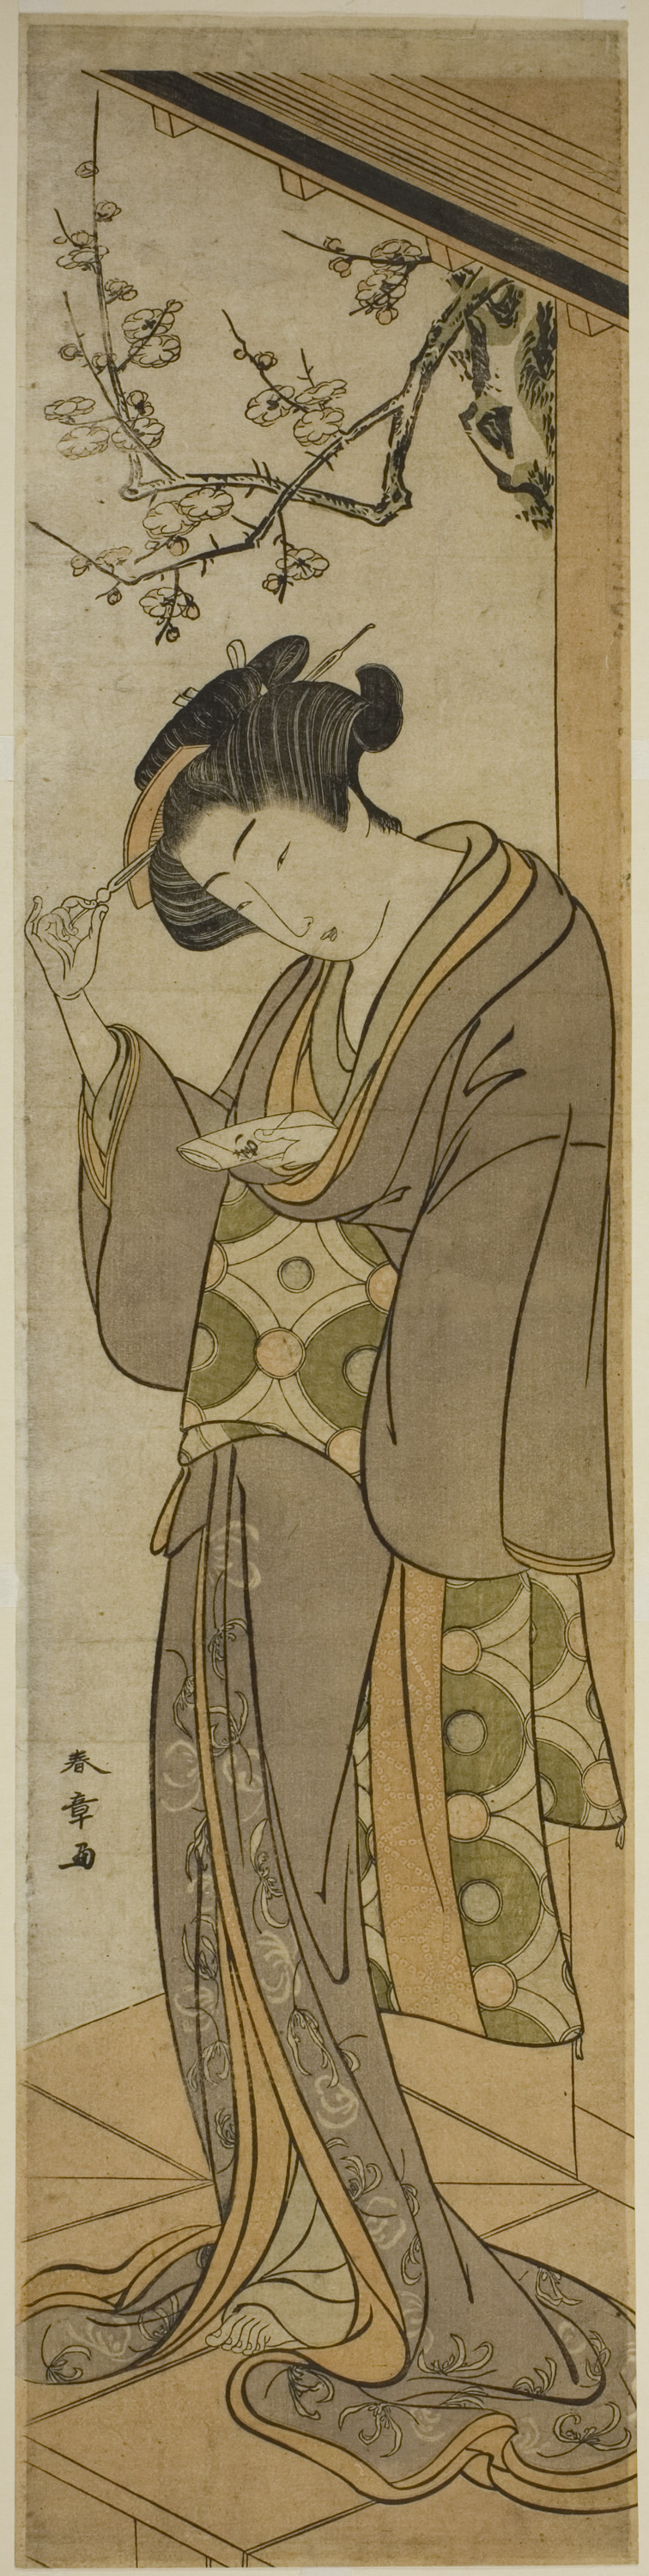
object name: Print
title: Woman on a Verandah About to Open a Letter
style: Japanese (culture or style)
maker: Katsukawa Shunsho 勝川 春章; Japanese, 1726-1792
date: mid–late 1770s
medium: Color woodblock print; wide hashira-e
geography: Japan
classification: woodblock print; print; asian art